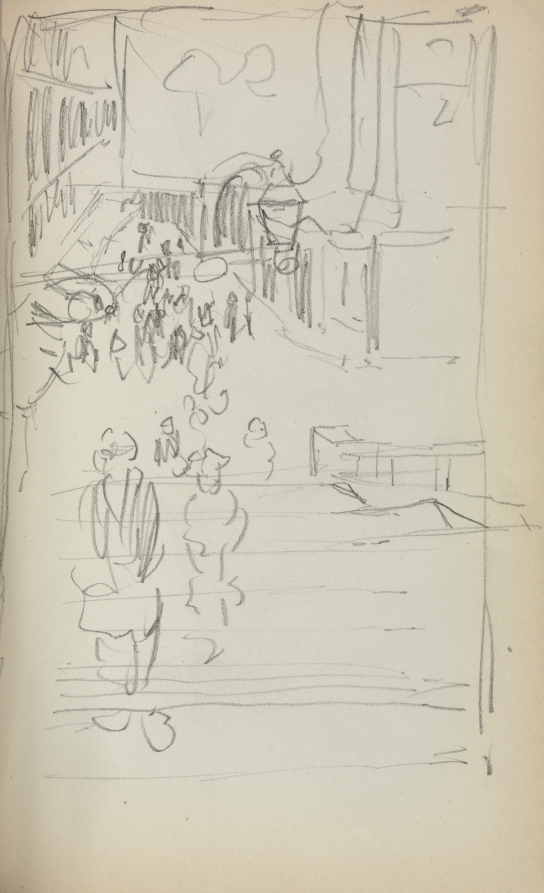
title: Italian Sketchbook: Stairs with Figures (page 165)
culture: America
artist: Maurice Prendergast (American, born Newfoundland [now Canada], 1858–1924)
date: 1898–1899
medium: pencil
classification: Bound Volume